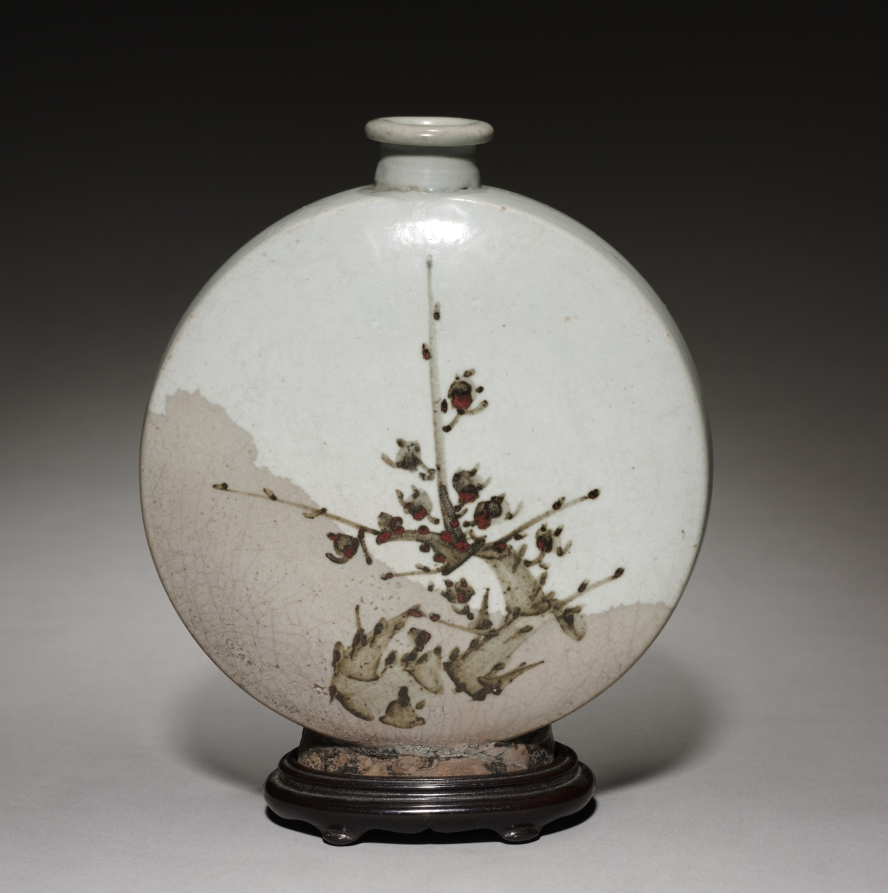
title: Wine Flask with Plum and Bamboo Design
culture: Korea, Joseon dynasty (1392–1910)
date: 1600s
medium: glazed porcelain with underglazed iron design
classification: Ceramic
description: This Korean wine flask embodies Lin Bu’s poetic line "Plums’ subtle scent pervades the moonlit dusk": its circular shape alludes to the full moon, and the gray color unintentionally spread on the flask’s lower part suggests the permeating scent of plum. The other side of the flask features a bamboo design. The plum and bamboo derive from the motif of the Four Gentlemen, which compares four plants to Confucian scholarjunzi, or "gentlemen."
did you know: The shape of this bottle can be traced all the way back to an ancient Persian pilgrim’s flask.